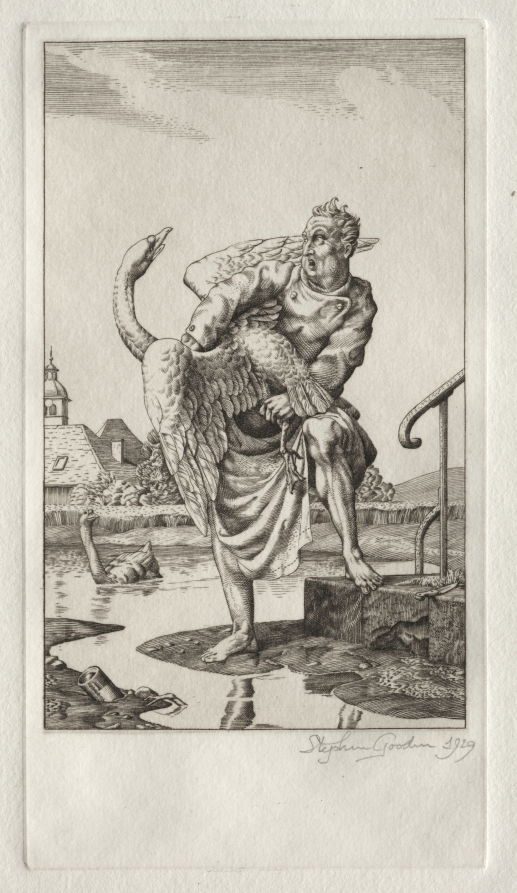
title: The Fables of Jean de la Fontaine: The Swan and the Cook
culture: England, 20th century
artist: Stephen Gooden (British, 1892–1955)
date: 1929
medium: engraving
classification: Print